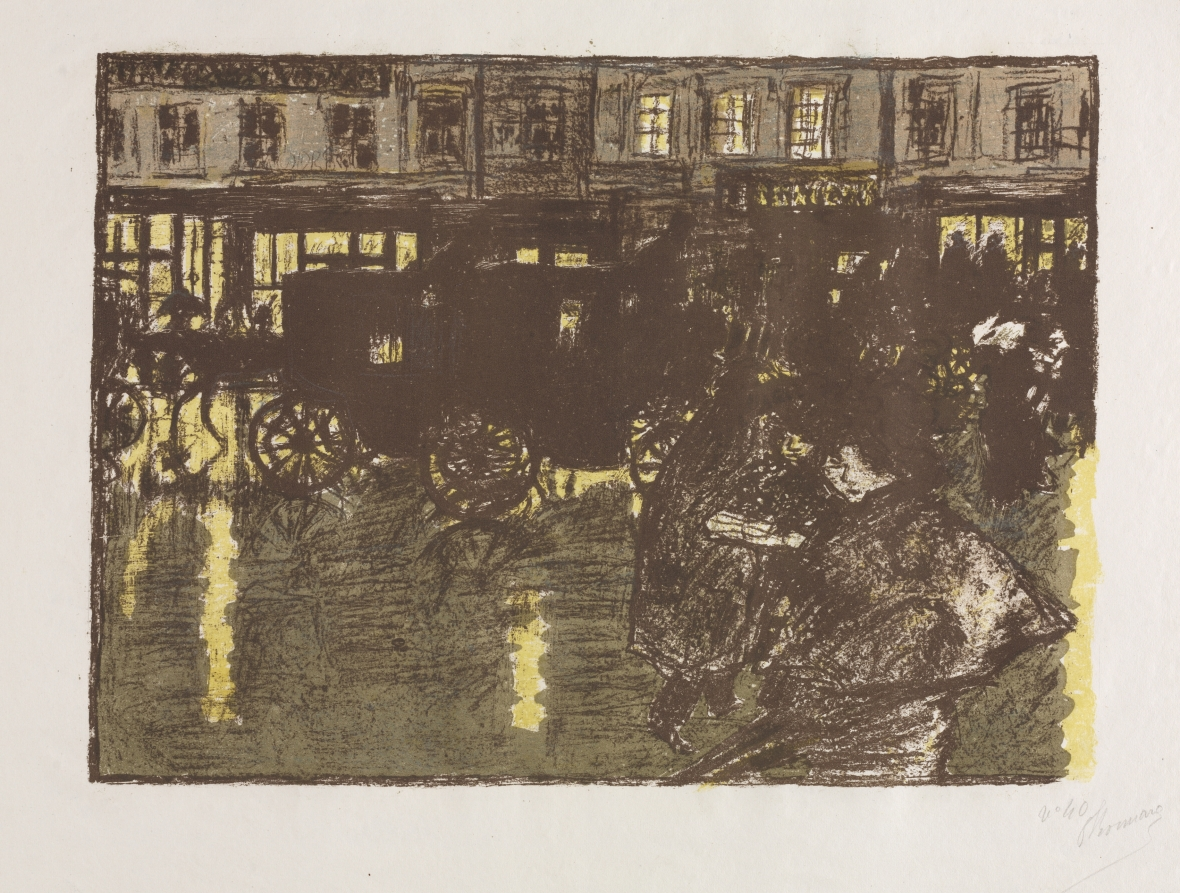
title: Street at Evening in the Rain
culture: France, 19th century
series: Some Scenes of Parisian Life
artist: Pierre Bonnard (French, 1867–1947)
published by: Published by Ambroise Vollard; Printed by Auguste Clot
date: 1899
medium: lithograph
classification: Print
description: This suite of color lithographs collected Pierre Bonnard’s observations of city life, ranging from animated street scenes to distant observations glimpsed from the artist’s Montmartre studio window. Rather than memorializing the famous monuments of Paris, Bonnard preferred to depict small neighborhood scenes populated by urbanites shopping and strolling and by vendors selling their wares. The setting for one of the prints is the second-largest public park in Paris, the Bois de Boulogne, which was a popular place for families to relax, stroll, and enjoy carriage rides around the lakes. Two prints are nocturnal scenes in which gaslight emanating from shop windows is reflected on the wet streets, creating passages of bright yellow in the otherwise dark compositions. Bonnard’s favorite subjects, such as the Parisienne—a young, fashionable, modern woman—as well as children and dogs, appear repeatedly throughout the prints in the suite.